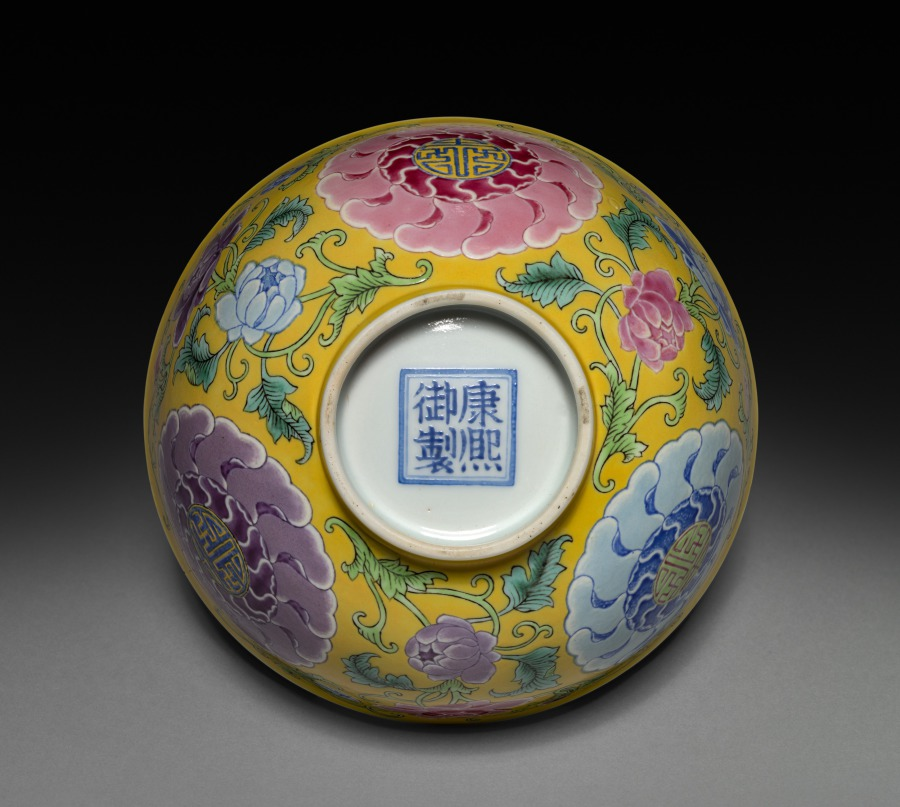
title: Bowl with Floral Sprays and Inscribed Medallions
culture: China, Jiangxi Province, Jingdezhen kilns, Qing dynasty (1644–1911)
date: 1800s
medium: porcelain with famille rose overglaze enamel decoration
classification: Ceramic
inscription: 大清康熙年制